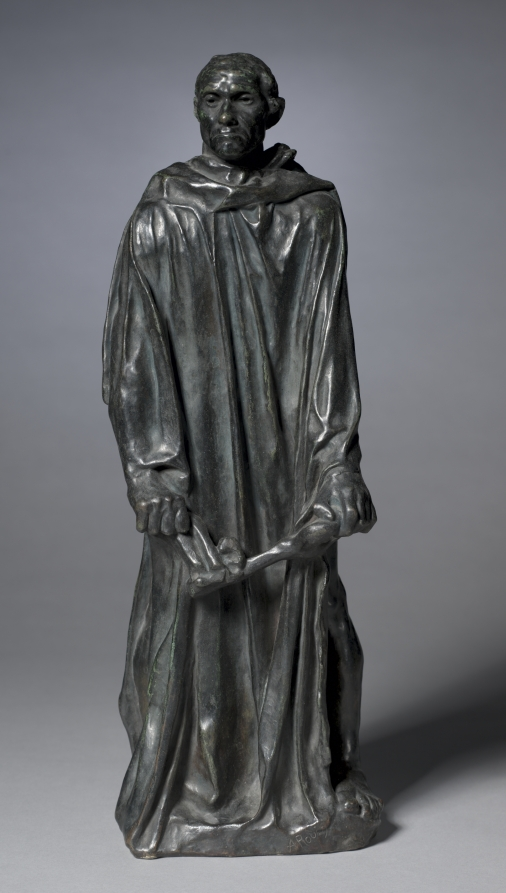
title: Jean d'Aire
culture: France, 19th century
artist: Auguste Rodin (French, 1840–1917)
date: 1884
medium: bronze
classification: Sculpture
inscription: signed front of base: "A. Rodin." Inscribed back of base: "Alexis Rudier/Fondeur, Paris."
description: In 1884 Rodin received a commission to create a large public monument honoring six French men who volunteered to be taken prisoner by an English army in exchange for the English releasing the town of Calais from a brutal 11-month siege. This reduced cast depicts one of the volunteers from the monument. Rather than idealized heroes, Rodin portrays the prominent citizens known as burghers as ordinary men experiencing personal confrontations with death. Jean d’Aire faces his fate with stoic resolve. The thick folds of his tunic weigh heavily on his body, as if symbolic of an internal struggle between his willingness to sacrifice his life and a desire to live. His intense glare into space seems to betray the dread and anxiety raging within his mind. Immensely popular as an independent sculpture, Rodin made numerous versions in various sizes.